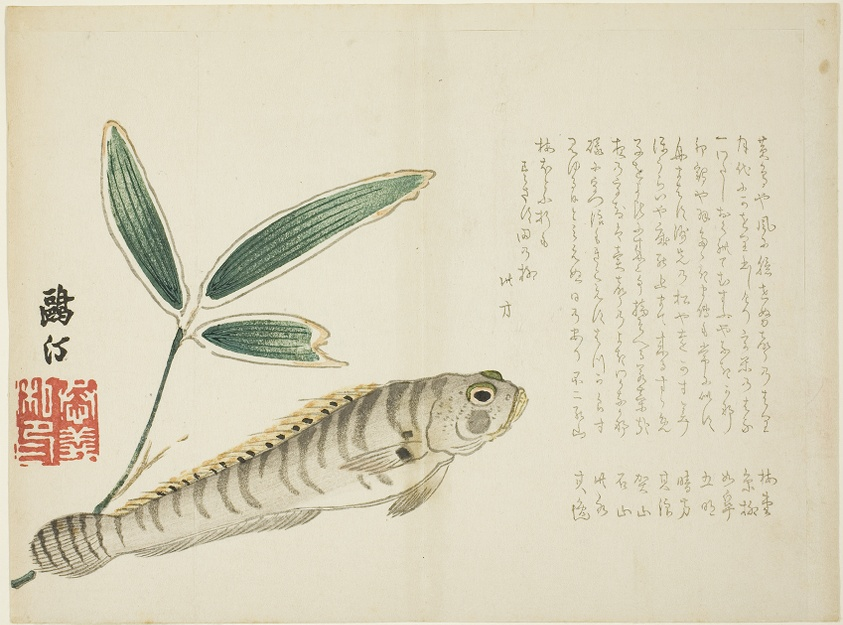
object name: Print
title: Fish and Bamboo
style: Japanese (culture or style)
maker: Maezawa Otei (Japanese, 1827-?)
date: 1860s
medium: Color woodblock print; surimono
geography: Japan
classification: woodblock print; print; asian art